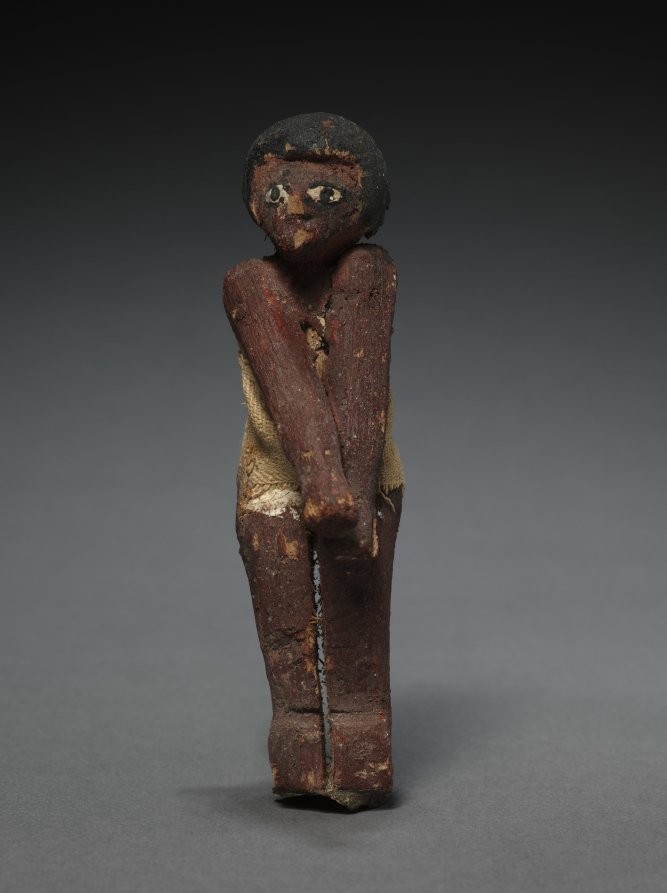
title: Seated Model Sailor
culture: Egypt, Middle Kingdom (2040–1648 BCE), Dynasties 11–12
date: c. 2000–1000 BCE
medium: painted sycamore fig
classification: Funerary Equipment